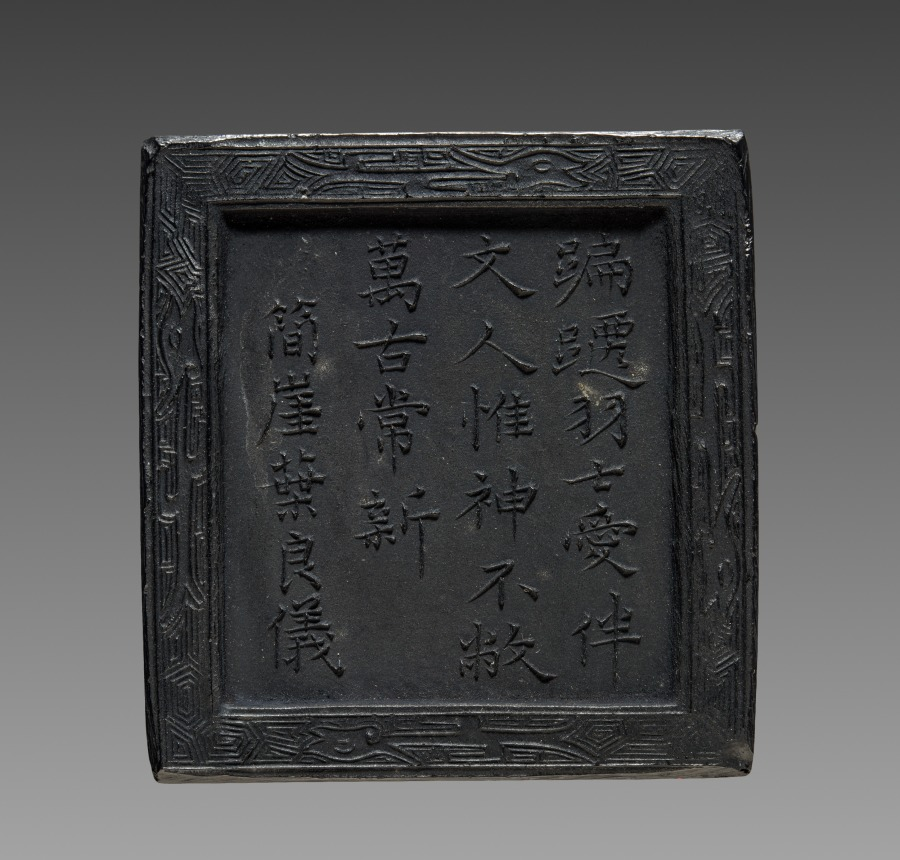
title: Ink Cake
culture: China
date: 1800s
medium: ink cake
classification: Miscellaneous